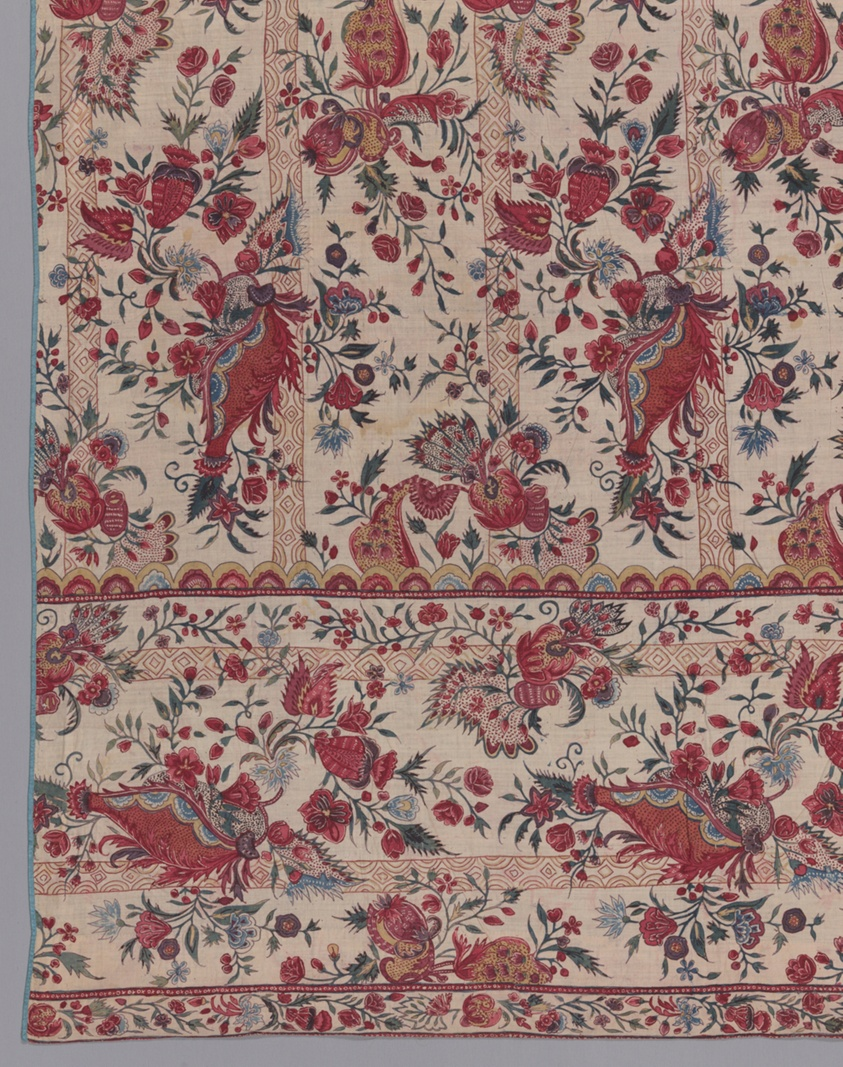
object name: Coverings and Hangings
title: Chintz Curtain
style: 18th Century, chintz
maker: Indian export for European market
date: First quarter 18th century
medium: Cotton, plain weave; painted and resist-dyed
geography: India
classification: weaving; textile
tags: botanical/floral, abstract objects, diamond shapes, floral motifs, flowers